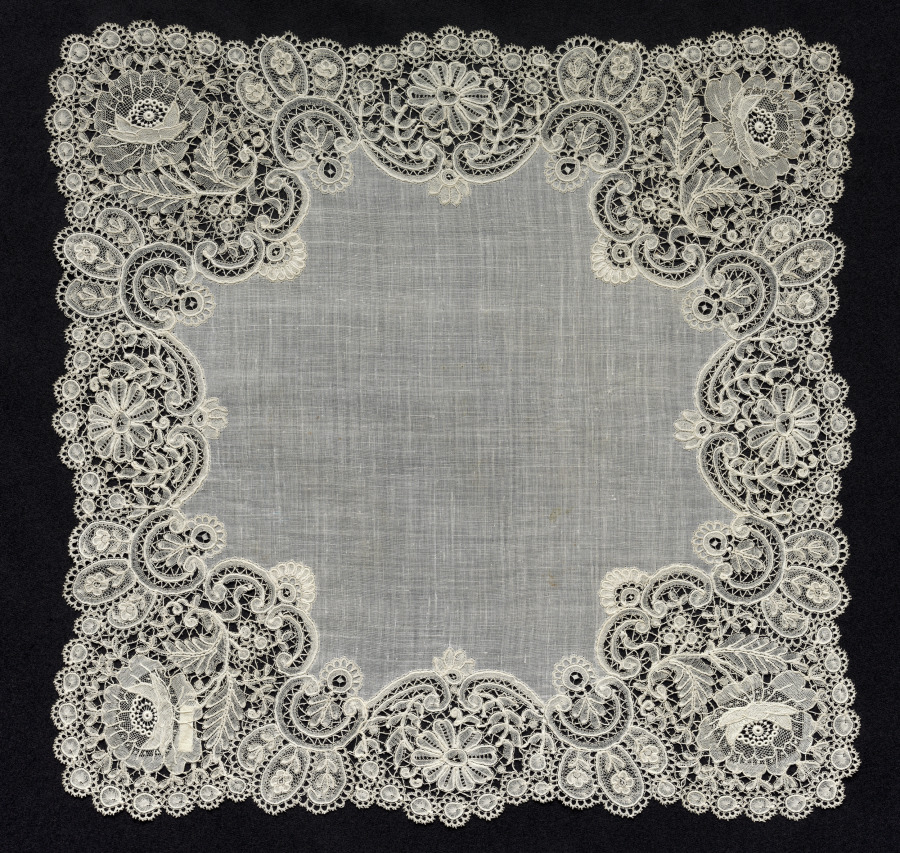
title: Lace Handkerchief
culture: Belgium, Brussels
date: 1800s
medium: Plain weave linen center: bobbin lace (Point Duchesse) and needle lace border, and appliqué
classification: Lace